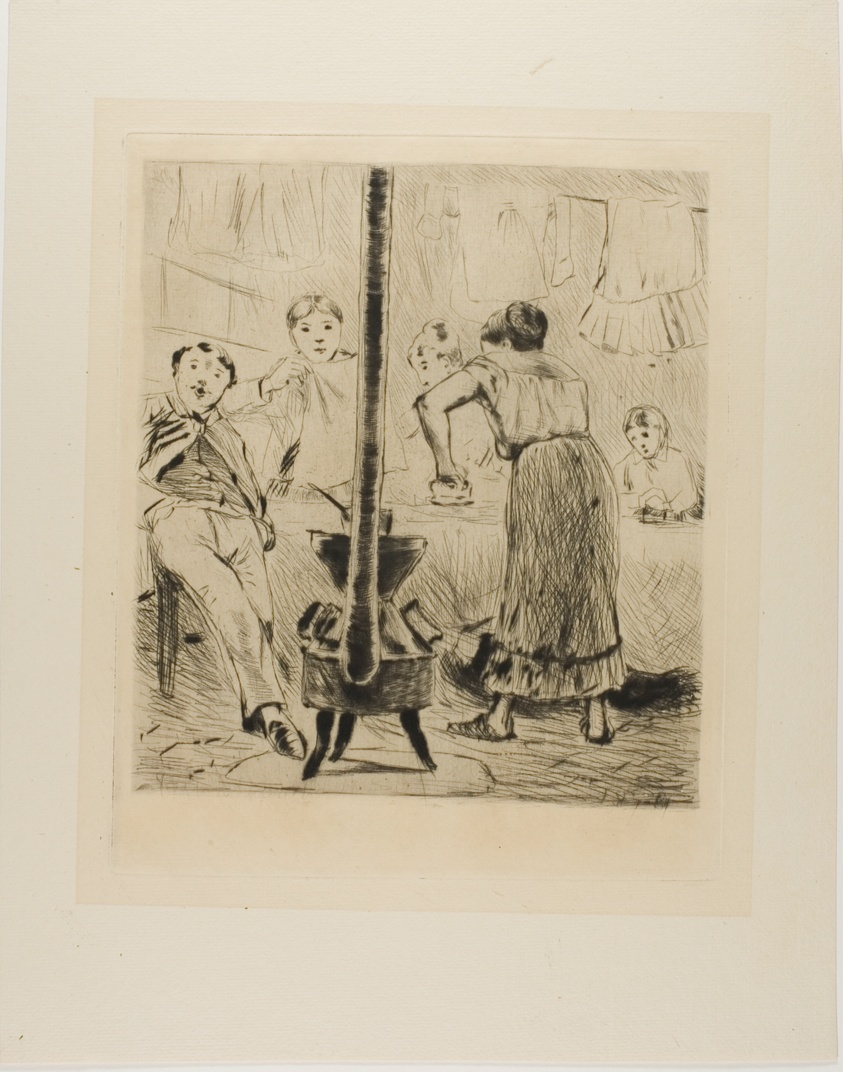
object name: Print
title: Plate from l'Assommoir (women ironing, man seated before a woodstove)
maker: Gaston La Touche (French, 1854-1913)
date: 1879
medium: Drypoint and plate tone on ivory laid paper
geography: France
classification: drypoint; print; prints and drawing